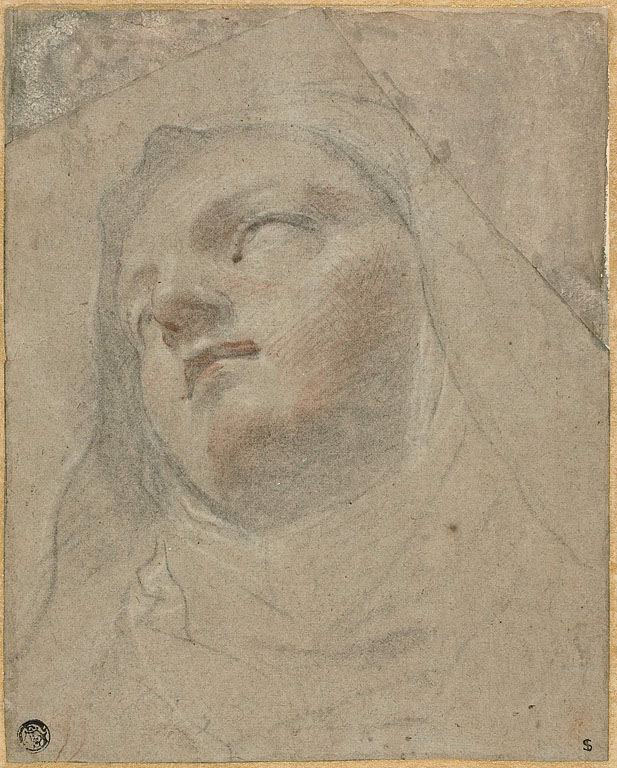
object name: Drawing and Watercolor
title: Head of a Dominican Nun: Study for the Ecstasy of Saint Dominic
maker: Domenico Maria Canuti (Italian, 1625-1684)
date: 1673/75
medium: Black, red, and white chalk on warm gray laid paper, laid down on cream laid card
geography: Italy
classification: chalk; drawings (visual works); prints and drawing